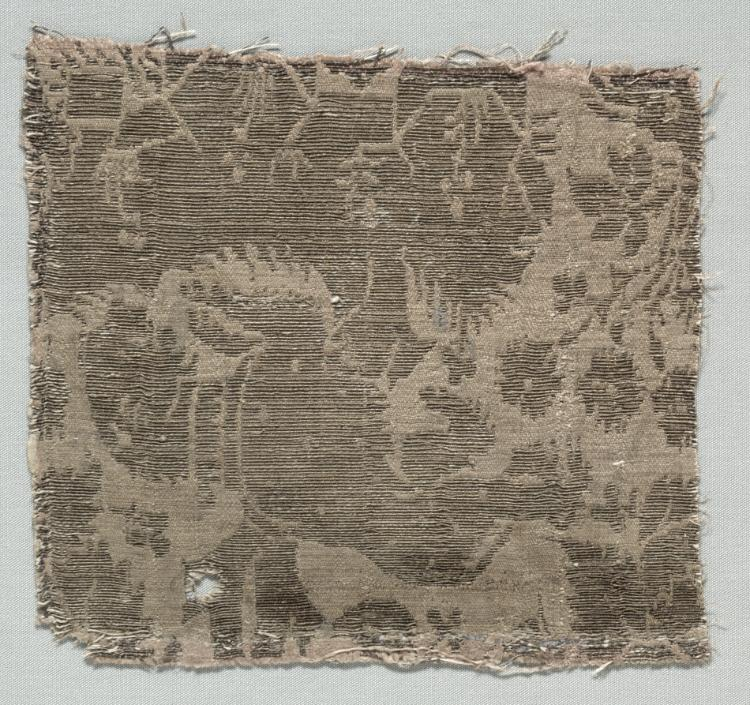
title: Silk Fragment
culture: Italy, second quarter of 15th century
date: 1425–1450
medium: lampas weave, silk and gold thread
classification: Textile